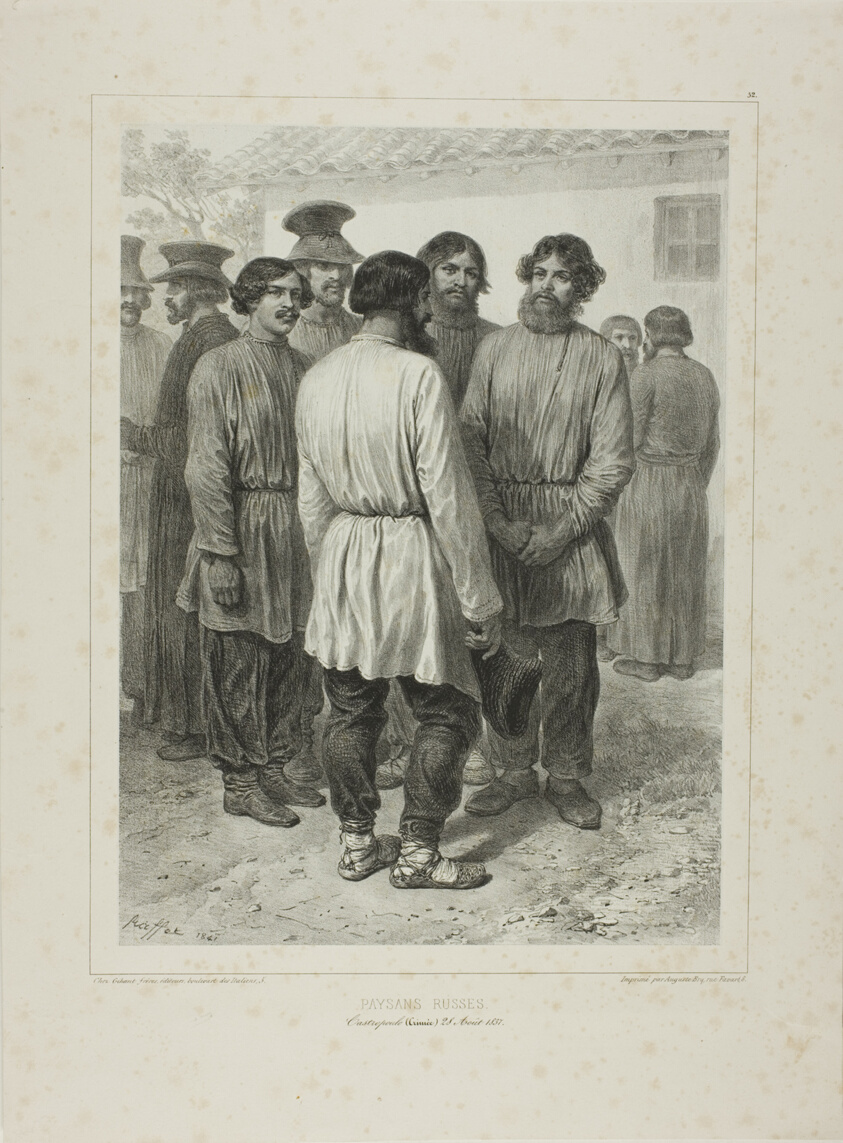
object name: Print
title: Russian Peasants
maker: Denis Auguste Marie Raffet (French, 1804-1860); printed by Auguste Bry (French, 19th century); published by Chez Gihaut Frères (French, 19th century)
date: 1841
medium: Lithograph in black on gray chine laid down on ivory wove paper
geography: France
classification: lithograph; print; prints and drawing